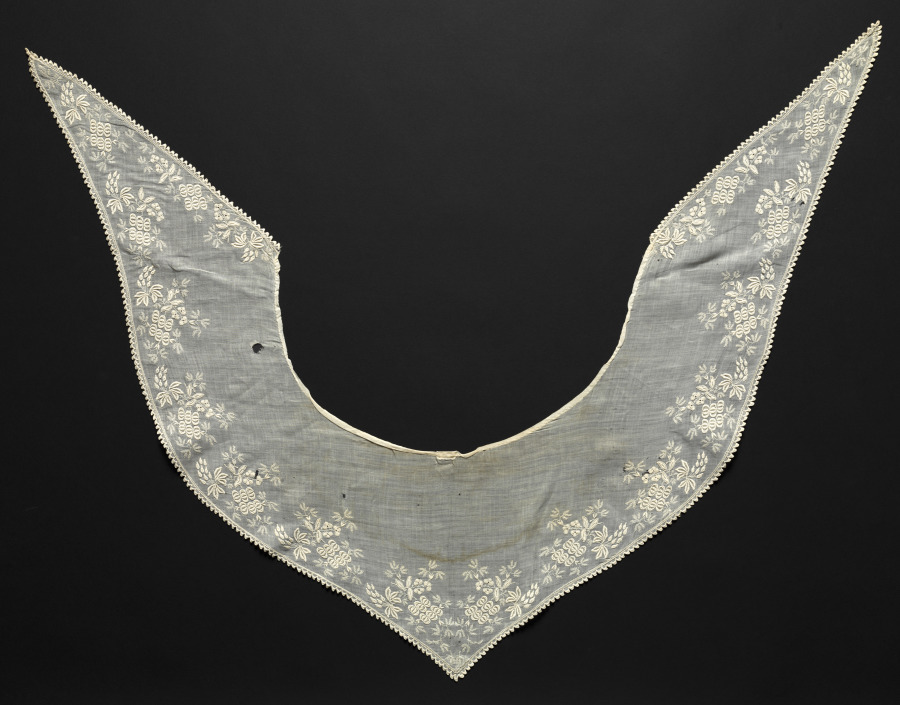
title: Collar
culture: America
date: c. 1836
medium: Linen: embroidered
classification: Embroidery